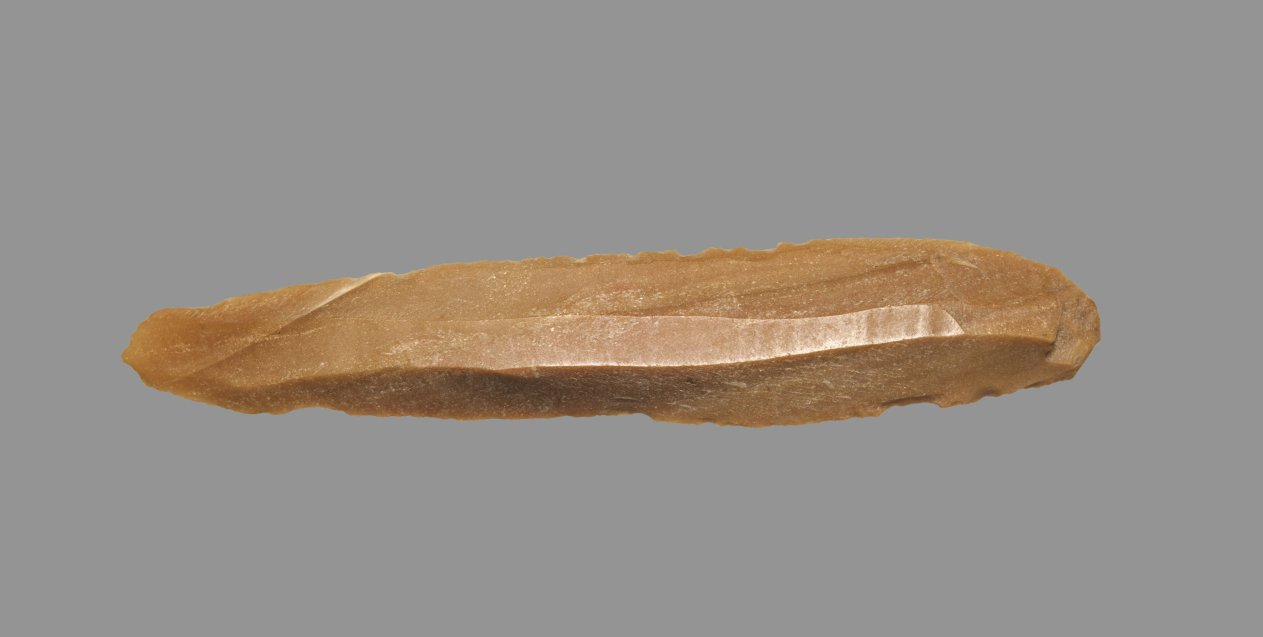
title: Sickle Blade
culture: Egypt, Middle Kingdom (2040–1648 BCE), Dynasty 12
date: 1980–1801 BCE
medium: flint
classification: Implements